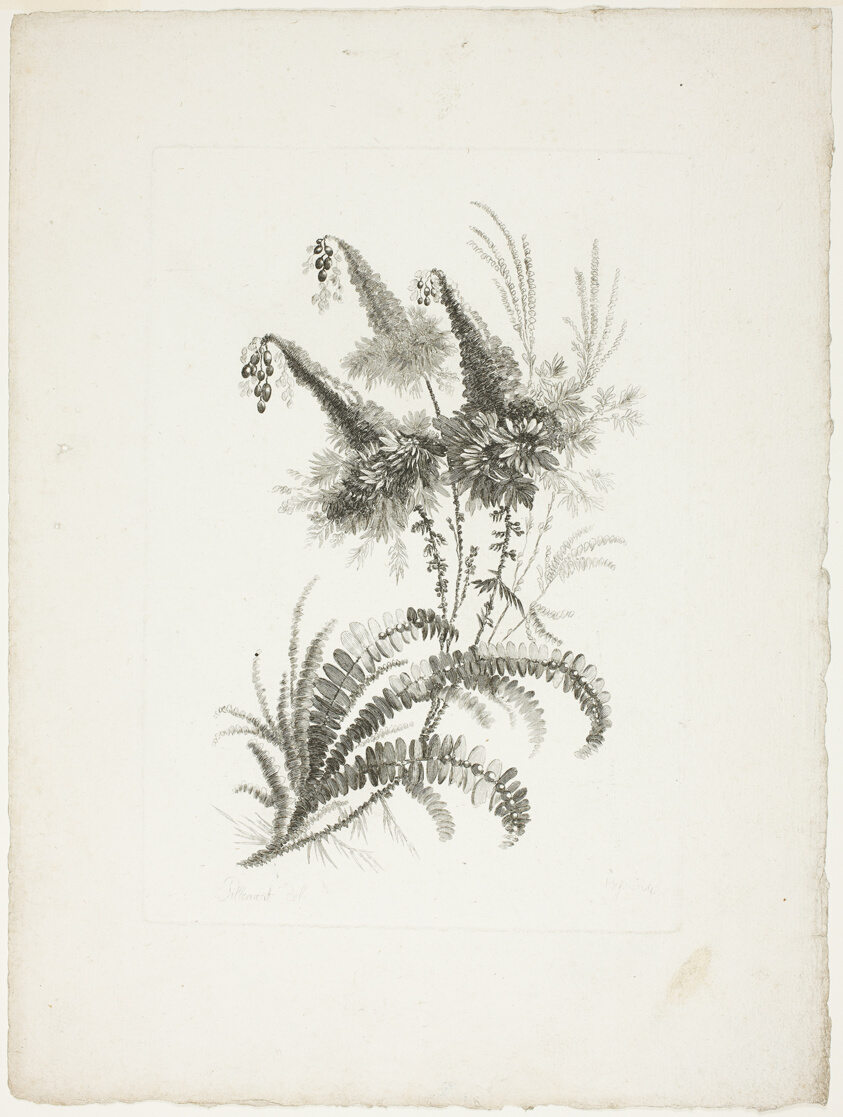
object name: Print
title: Bouquet, from Collection of New Flowers of Taste for the Manufacture of Persian Cloth, Invented and Drawn by Jean Pillement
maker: Johann Heinrich Hess (Germany, born 1746); after Jean-Baptiste Pillement (French, 1728-1808); published by Charles Leviez (French, 1708-1778)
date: 1765/70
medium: Etching on ivory laid paper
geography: Germany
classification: etching; print; prints and drawing